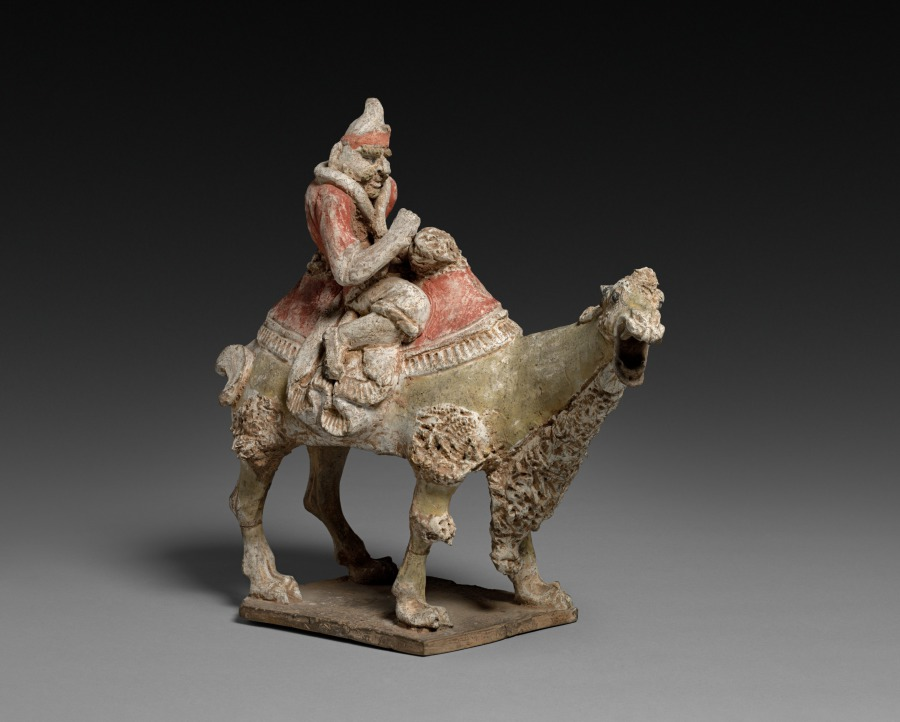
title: Camel with Rider (Tomb Figure)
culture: China, Sui dynasty (581-618) - Tang dynasty (618-907)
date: 20th Century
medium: brown earthenware with polychromy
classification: Sculpture